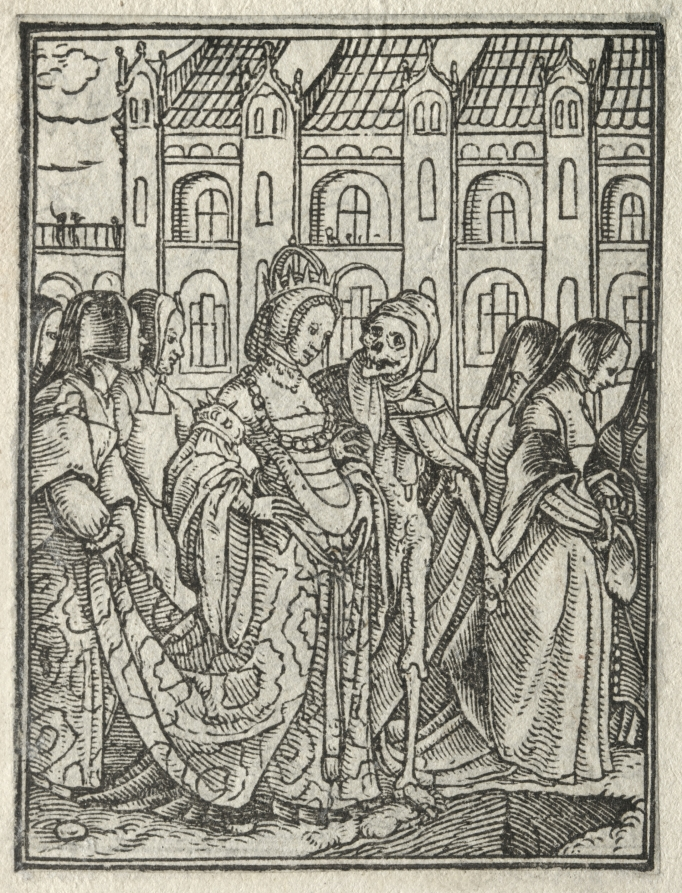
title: The Dance of Death: The Cardinal; The Empress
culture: Germany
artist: Hans Holbein the Younger (German, active England and Switzerland, 1497/98–1543)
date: c. 1526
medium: woodcut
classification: Print